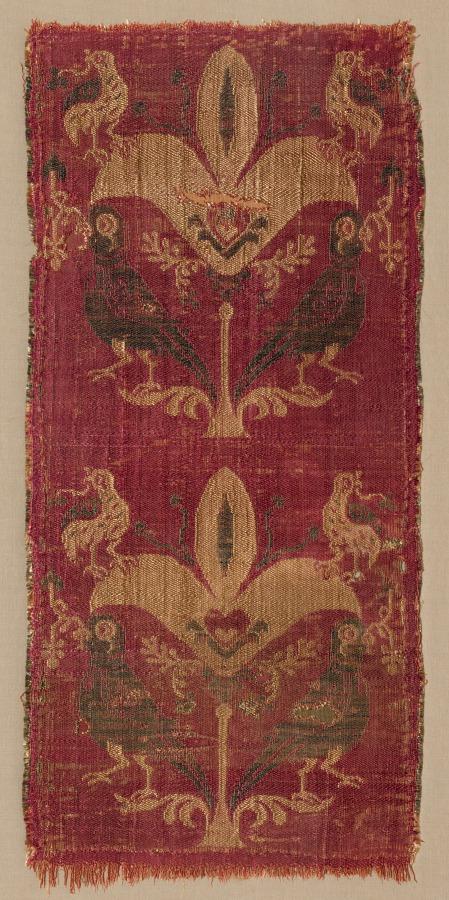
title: Palmettes and Birds from a Tunic or Curtain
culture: Egypt or Syria, Byzantine or Islamic period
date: 500s–600s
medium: Silk; complementary weft-faced twill weave with inner warps (samite)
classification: Textile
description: The symmetrical pattern displays back-to-back green parrots with branches in their beaks and two speckled birds perched on the leaves of a long-stemmed palmette.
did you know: These elaborate patterns were woven on large, early looms known as drawlooms that automatically repeated designs across the width of the fabric, often in mirror-image symmetry.